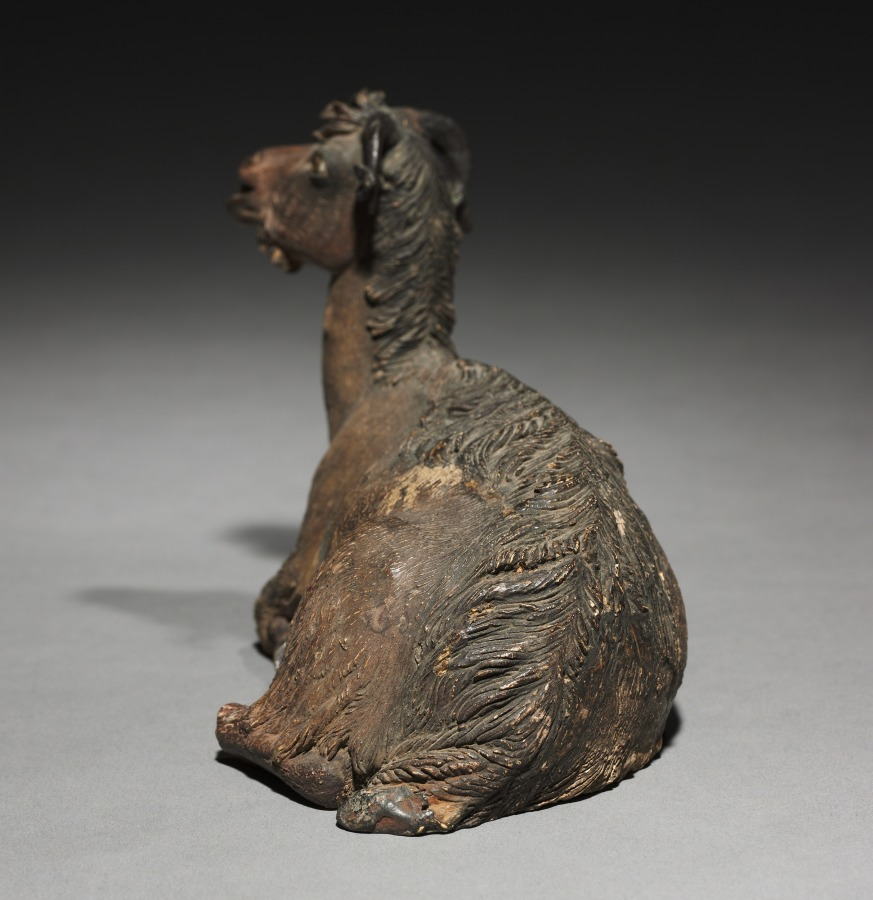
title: Figure from a Crèche: Sitting Ram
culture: Italy, Naples, late 18th-early 19th century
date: 1780–1830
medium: painted terracotta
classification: Sculpture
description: The practice of creating scenes of the Nativity for the home dates from the early 1700s in Italy, where people began to set up doll-like figures of about a foot or less in height. The custom was particularly popular in Naples around 1800, where crèche scenes (crèche means cradle, or crib) included many figures, whose heads and hands of painted terracotta, stuffed cloth bodies, and clothing adapted from contemporary local costumes gave them an amazingly realistic character. Representations of the birth of Jesus can be traced to the first few centuries of Christianity. Both living creatures and sculptural depictions of them were used from early times. By the late middle ages it was customary to create life-size figures of wood or stone, naturalistically painted, to represent the characters who participated in the events of Jesus's early life. These sculptures were then arranged in scenes illustrating one or both of the most important of these events, the Adoration of the Shepherds and the Adoration of the Magi-the three kings from the East who came to pay homage to the Christ child. Used in churches, these large figures were especially popular in Italy, Central Europe, Spain, and Portugal. This Object in Focus presentation was organized by Henry Hawley, Curator of Renaissance and Later Decorative Arts and Sculpture.